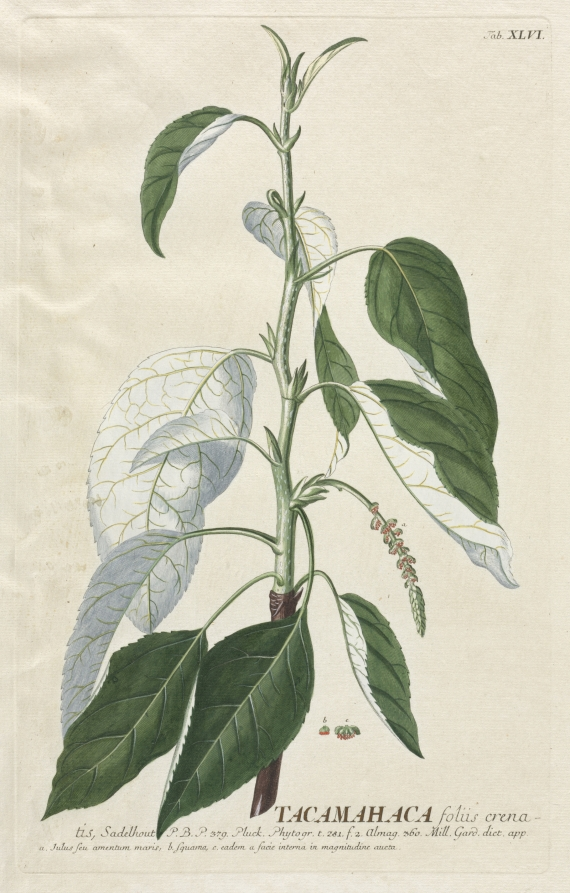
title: Plantae Selectae: No. 46 - Tacamahaca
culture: Germany, 18th century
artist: Georg Dionysius Ehret (German, 1708–1770)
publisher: Christopher Jacob Trew (German, 1695–1769)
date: published 1750–73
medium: engraving, hand-colored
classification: Print